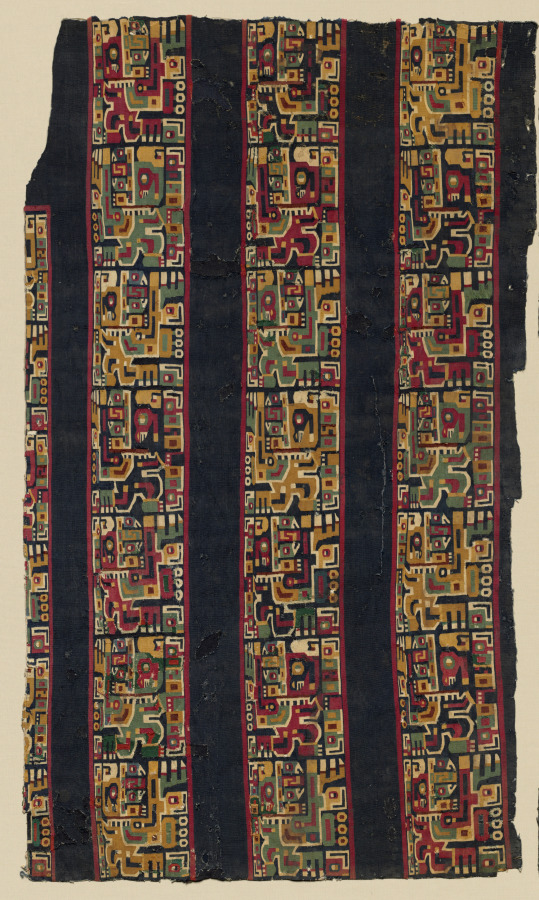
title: Half of a Sleeved Tunic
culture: Central Andes, Middle Horizon, Wari, 6th-11th century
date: c. 500–1000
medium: single-interlocked tapestry; cotton warp; camelid fiber weft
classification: Textile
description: The bird-headed creature in profile that repeats in each of this tunic's design fields gazes upward, holds a staff of authority in front of its body, and wears an ornate headdress behind which a three-feathered wing can be seen. The extremely high technical quality of such tunics suggests that the Wari reserved bird imagery for their most exalted rulers. Here, the original incorporated more than twice as much yarn as the routine--some 19 miles, all handmade and much dyed an inky, dark blue, the most prestigious of Wari colors.